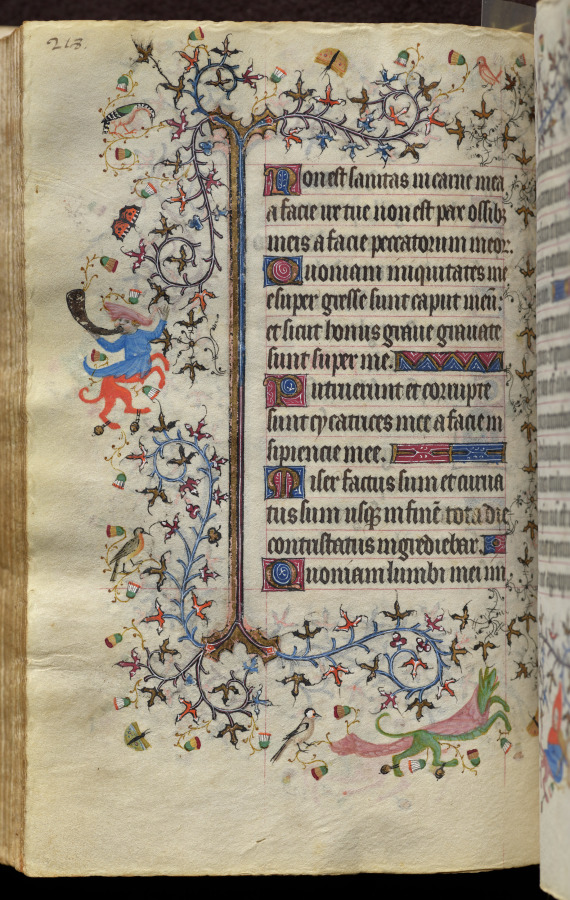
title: Hours of Charles the Noble, King of Navarre (1361-1425): fol. 109v, Text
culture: France, Paris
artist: Master of the Brussels Initials and Associates (French)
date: c. 1405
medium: ink, tempera, and gold on vellum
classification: Bound Volume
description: This precious volume was obviously highly prized by its owner, the French-born King of Navarre, who had his coat of arms painted on no less than twenty folios. Rather than directly commissioning this manuscript from a specific workshop, it seems that Charles the Noble acquired his book of hours -- perhaps ready-made for the luxury market -- while on a trip to Paris in 1404-05. A collaborative effort, six painting styles are evidenced within the pages of this codex, those of two Italians, two Frenchmen, and two Netherlanders. The painter who was responsible for the planning and decoration of the book, and who produced seventeen of the large miniatures, was a Bolognese artist known as the Master of the Brussels Initials. His principal assistant, responsible for most of the borders, was a Florentine who signed his name "Zecho" da Firenze on folio 208 verso.